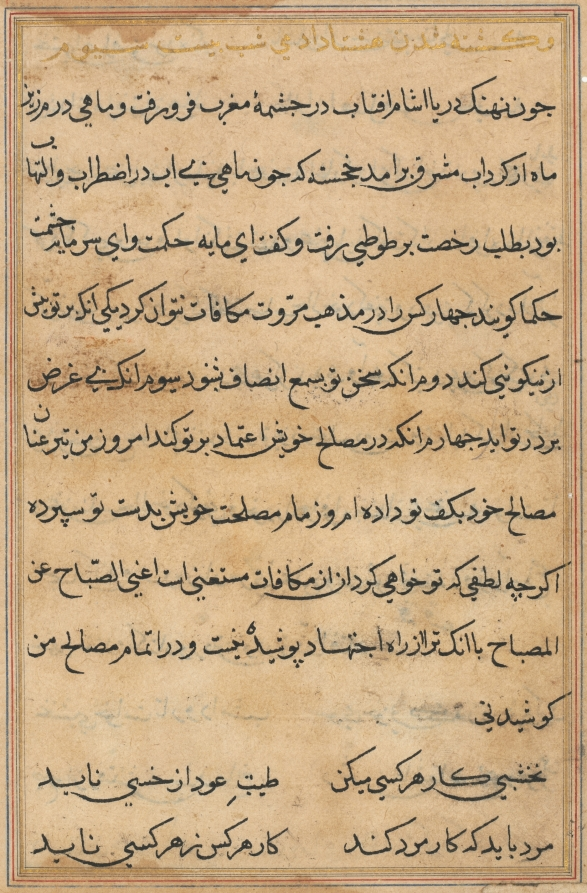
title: Page from Tales of a Parrot (Tuti-nama): text page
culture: Mughal India, court of Akbar (reigned 1556–1605)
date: c. 1560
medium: gum tempera, ink, and gold on paper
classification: Painting